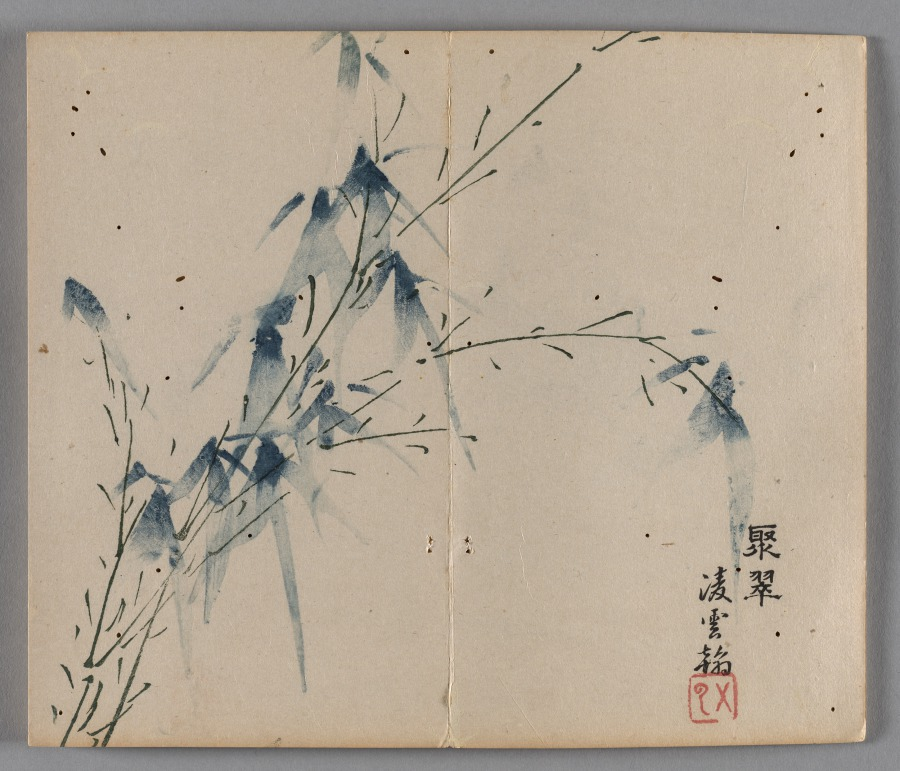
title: Ten Bamboo Studio Painting and Calligraphy Handbook (Shizhuzhai shuhua pu): Bamboo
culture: China, Qing dynasty (1644-1911)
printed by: Hu Zhengyan (Chinese, c. 1584–1674)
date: 1633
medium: Woodblock-printed book; ink and colors on paper; first edition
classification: Print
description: Color printing reached a level of perfection in the early 1600s, as seen in this Ten Bamboo Studio Collection of Calligraphy and Painting and the Mustard Seed Garden Manual of Painting (printed 1679 and 1701). The painterly quality, precision in registering (aligning) the woodblocks, and harmonious colors made them the most successful color print editions in Chinese history. Both editions were printed and compiled in Nanjing, spread nationwide, and had a great impact on the arts in Japan and Korea.